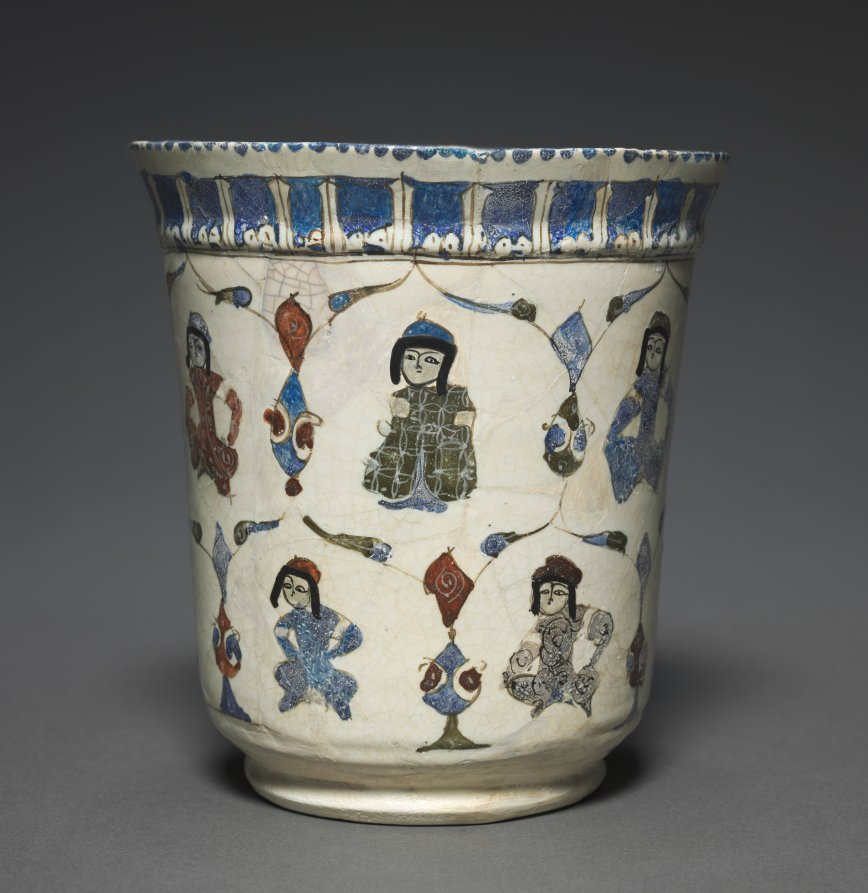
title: Mina'i Beaker with Seated Princes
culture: Iran, Kashan, Seljuq period of Iran (1037–1194)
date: 1180–1220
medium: Fritware with overglaze design, mina’i ware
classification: Ceramic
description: Mina’i ware takes its name from the Persian word for enamel. It was a luxurious type of pottery and used enamel painting to create true polychrome ceramic for the first time. Mina’i ware frequently combines blues, greens, and purples with sharp black and red executed with precise control. Figural scenes are quite common for these vessels and often recall book illustrations including rows of seated court members, sometimes flanking an enthroned ruler, and princely scenes of hunting or falconry.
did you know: A band of Kufic runs around the outside of the rim and another one is around the inside of the rim.